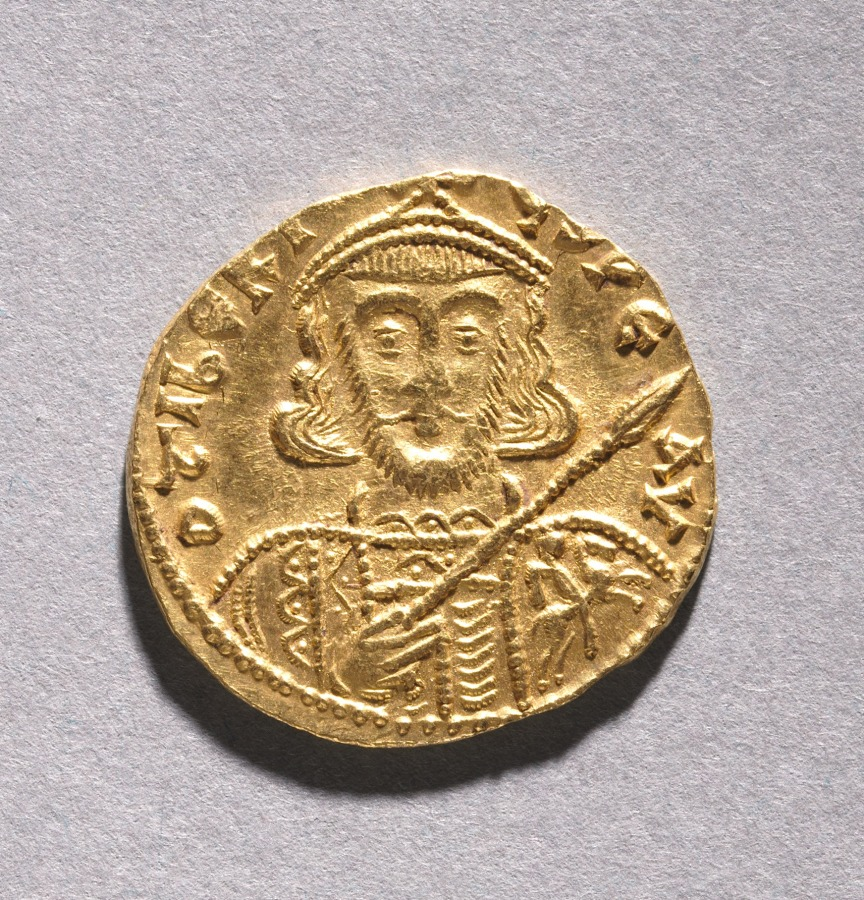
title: Solidus with Tiberius III Apsimarus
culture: Byzantium, Constantinople, late 7th-early 8th century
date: 698–705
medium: gold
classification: Coins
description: The vast number of surviving Byzantine coins attests to the level of trade across the empire. Controlled and supervised by the emperor, the producers of coins took care to represent his authority and reflect his stature. Talented artists were recruited to engrave the dies (molds) used for the striking of coins. Emperors increasingly came to include their heirs and co-emperors on their coinage, as well as other family members or even earlier rulers. Coins were recognized, then as now, as small, portable works of art. With their inscriptions and images, Byzantine coins provide valuable documentation of historical events and a record of the physical appearance of the emperors. The coins shown here include the solidus, the basic gold coin of 24 karats; the tremissis, a gold coin of one-third the weight and value of the solidus; and the nomisma, which in the 10th century replaced the solidus as the standard gold coin.